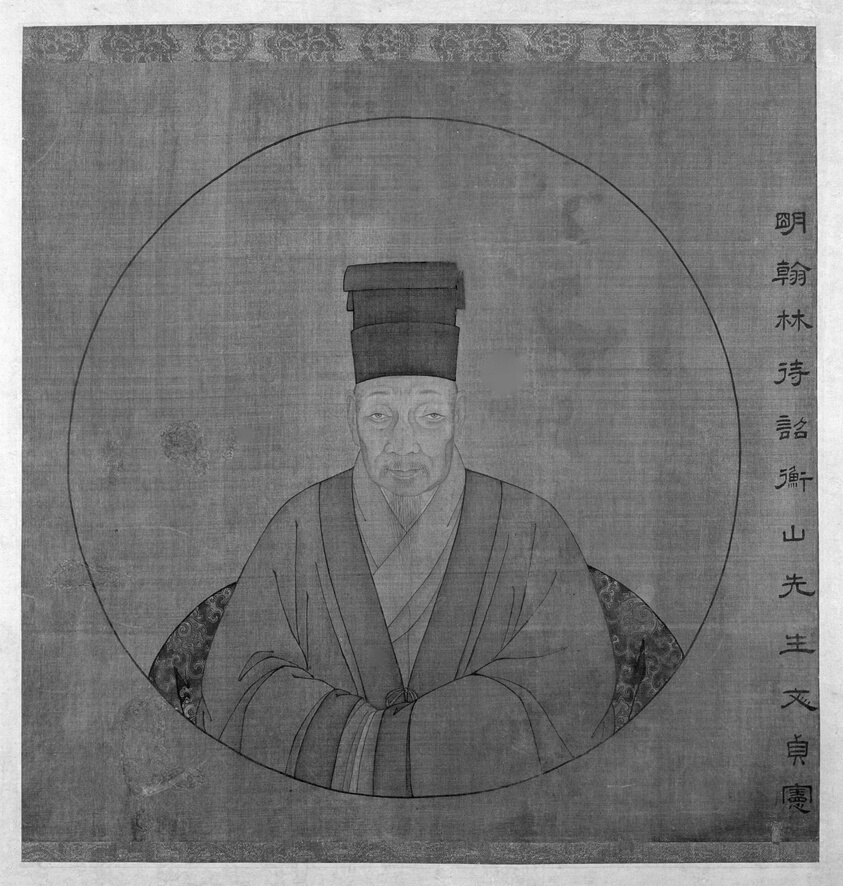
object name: Photograph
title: Portrait of Wen Zhengming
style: Chinese (culture or style)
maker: Artist unknown; Chinese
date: late Ming/early Qing dynasty, 17th century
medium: Album leaf; ink and light color on silk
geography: China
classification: painting; asian art; photograph; photography